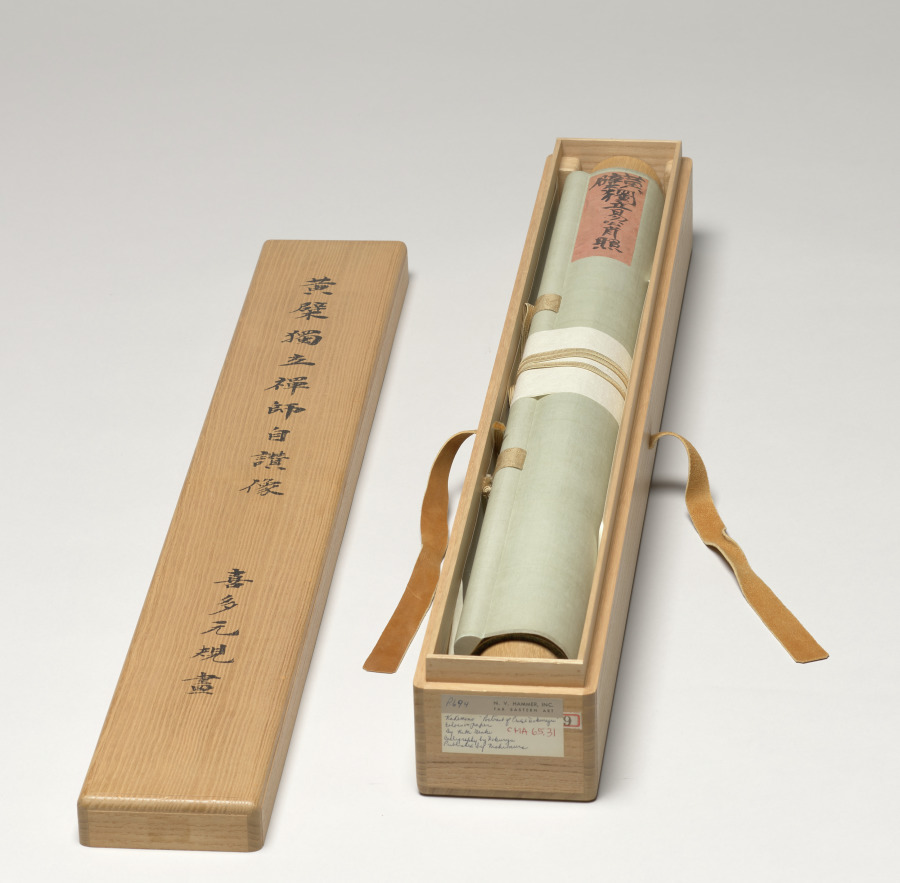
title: Portrait of Duli Xingyi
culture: Japan, Edo period (1615–1868)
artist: Kita Genki (Japanese, active c. 1664–98)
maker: Duli Xingyi (Chinese, 1596–1672)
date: 1671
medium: hanging scroll; ink and color on paper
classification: Painting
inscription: 1671 inscription at top of scroll by Duli Xingyi with three seals, 東矣䪩 (prefatory), 遺世獨立 (top) , 天外一閒人 (bottom); seal of Genki at lower left of painting 元規 .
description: In this portrait, the Ōbaku school Buddhist monk Duli Xingyi (born Tai Li, 1596–1672), whose name is pronounced Dokuryū Shōeki in Japanese, sits upon a woven mat holding a ceremonial scepter known as a ruyi, or nyoi in Japanese. Above his head is an insciption he added to the painting in 1671, the year before his death. It may be translated to read: Contemplative emptiness: the moon suspended over the village at midnight. Suddenly my soul is startled by the howl of an ape. Who could know that it would arouse me beyond my senses, and bring me an inner vision from Mt. Sumeru. (translated by Stephen Addiss and Kwan S. Wong) Originally from what is now the city of Hangzhou in China, Duli emigrated to Japan in 1653, where he took monastic vows. His skills in calligraphy and seal carving were formidable. Painter Kita Genki combined Chinese brush styles he learned in Nagasaki with Western painting techniques to capture Duli's likeness.